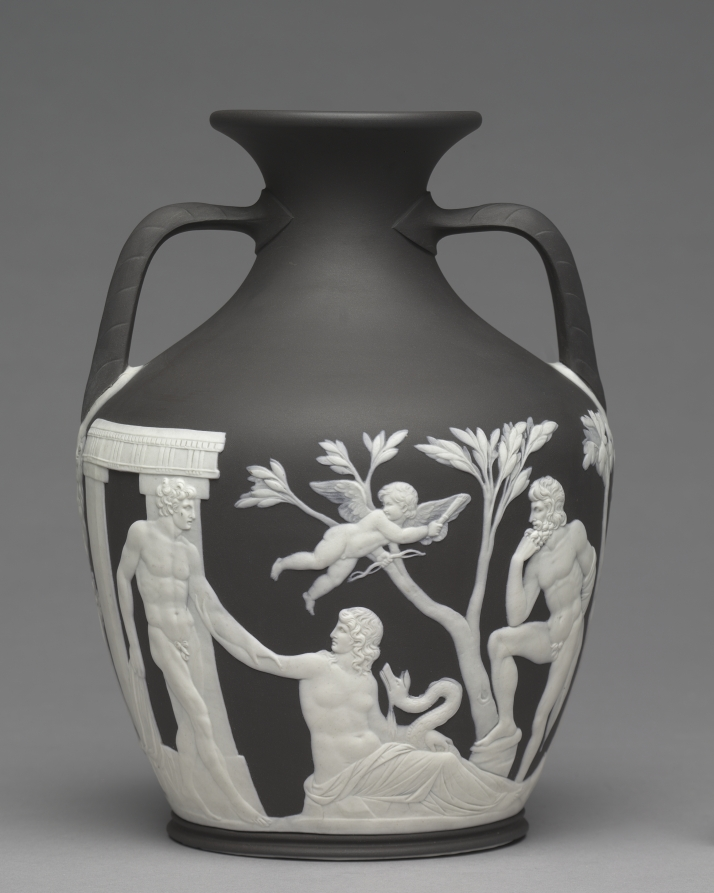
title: Portland Vase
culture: England, Staffordshire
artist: Josiah Wedgwood and Sons (Britain, Staffordshire, est. 1759)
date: c.1790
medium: jasperware with applied decoration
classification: Ceramic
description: The original Portland Vase is a Roman antiquity, made of dark-blue glass, dating from the first century AD. Such a rare archaeological find fascinated aristocratic collectors and artists alike, and eventually the vase came into the hands of the 3rd Duke of Portland in the 1780s. Around 1790 the duke lent the vase to the potter Josiah Wedgwood to make exact replicas in ceramic, of which the Cleveland example is one of the first editions. Eventually, the 4th Duke of Portland deposited the original Roman vase in the British Museum, where it resides today.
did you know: While the scene depicted here is not known for certain, many scholars believe that the Portland Vase portrays the wedding of Peleus and Thetis from Greek mythology.